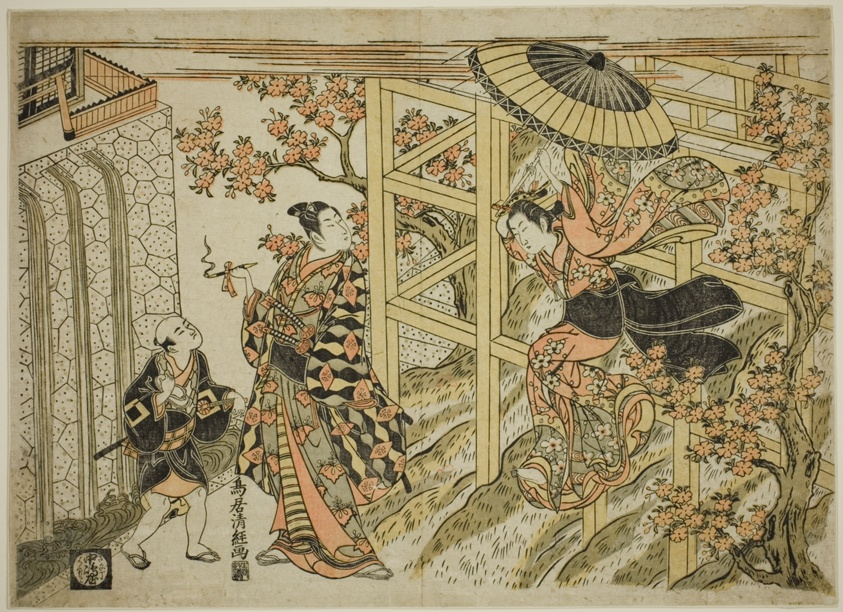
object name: Print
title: Girl Leaping from Kiyomizu Temple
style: Japanese (culture or style)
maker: Torii Kiyotsune (Japanese, active c. 1757–79)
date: c. 1765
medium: Color woodblock print; oban yoko-e, benizuri-e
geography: Japan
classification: woodblock print; print; asian art